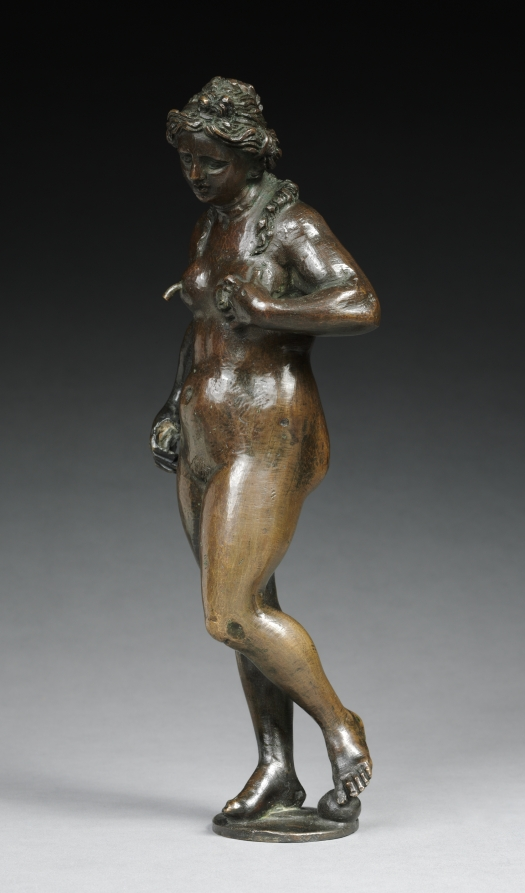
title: Fountain Figure of Abundance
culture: Germany, Augsburg, 16th century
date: c. 1530–40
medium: bronze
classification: Sculpture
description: The spout coming out of the breast indicates that this figure was part of a table fountain--a specialty of Augsburg artists. Her nudity and naturalistic proportions demonstrate the impact of Italian Renaissance art in southern Germany during the early 1500s.